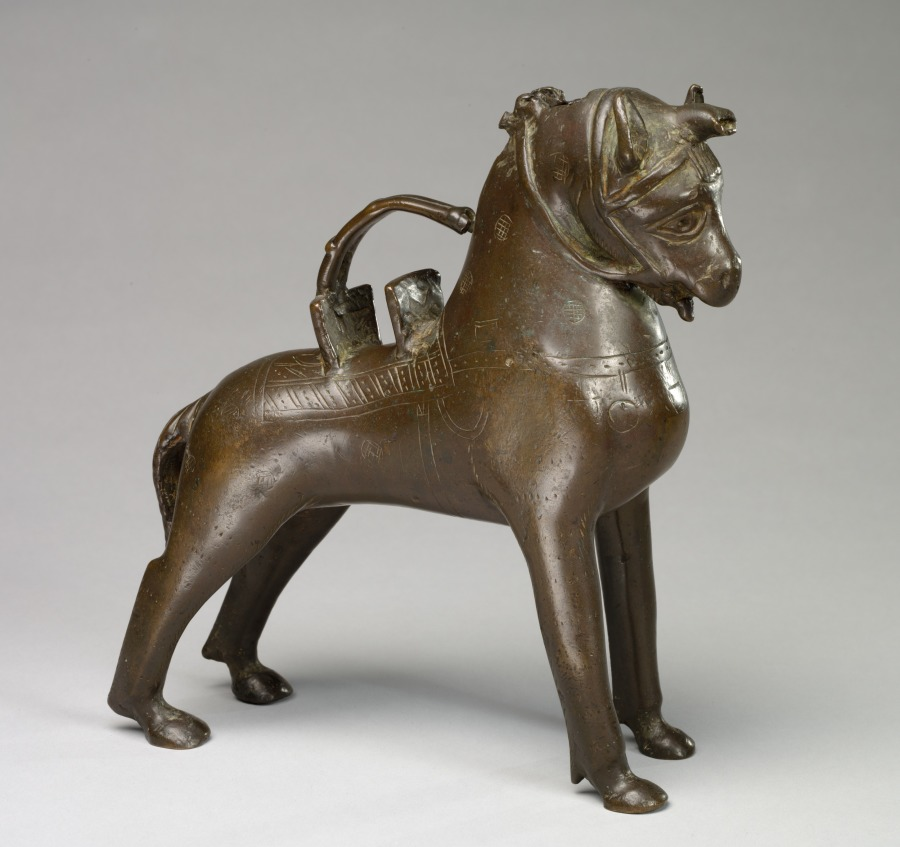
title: Aquamanile: Saddled Horse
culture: North Germany, Lower Saxony (?), 14th century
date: c. 1250–1300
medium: copper alloy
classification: Sculpture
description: Aquamanilia, from the Latin aqua meaning water and manus meaning hands, were hollow cast vessels used for hand washing. Although originally intended for liturgical use they became a common sight in the homes of the nobility in the 1200s and 1300s. Often filled with scented water, these vessels were used to wash hands just before and after eating a meal. An accompanying catch basin would have caught the water as it was being poured. Here we see a proud and alert dappled gray warhorse, highly prized in the medieval period. The saddled but riderless form is rare; other popular aquamanilia include lions, dragons, griffins, and human heads.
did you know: The pattern of crosshatched circles on the surface suggests that the horse is a dappled gray warhorse, a prized possession in the period.